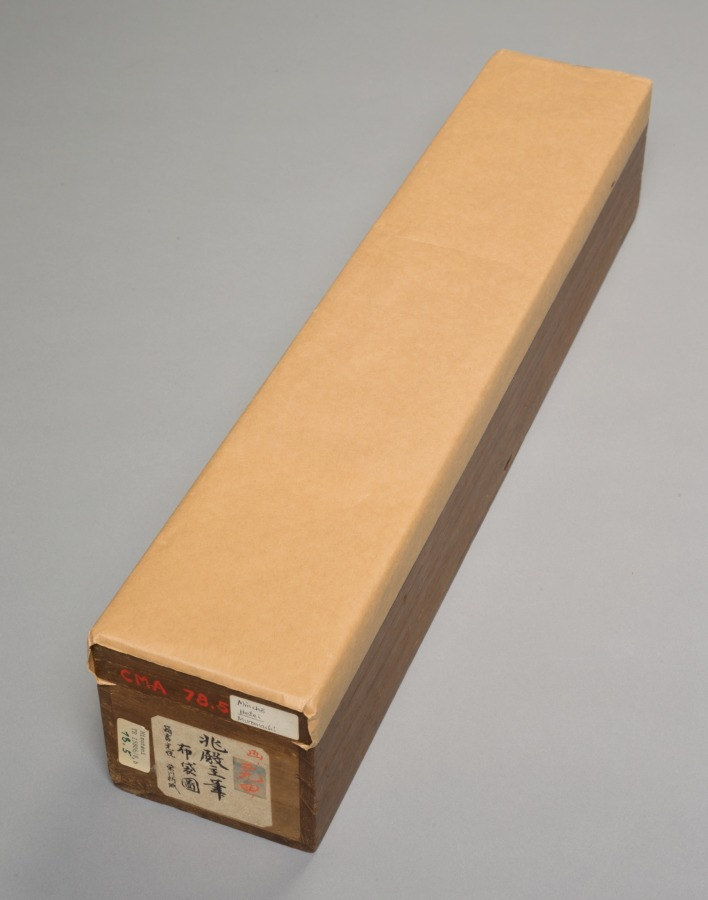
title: Hotei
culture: Japan, Muromachi period (1392–1573)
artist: Kichizan Minchō (Japanese, 1352–1431)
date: late 1300s–early 1400s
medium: hanging scroll; ink and slight color on paper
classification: Painting